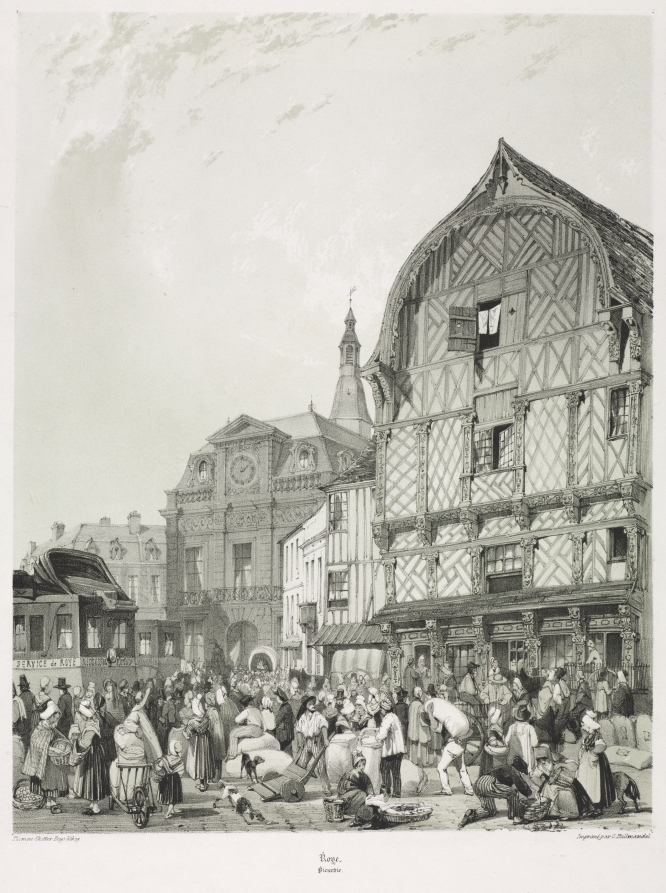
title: Picturesque and Romantic Journeys in Old France, Picardie (Vol. 2): Roye (Voyages pittoresques et romantiques dans l'ancienne France par Charles Nodier, J. Taylor, et Alphonse de Cailleux: Roye)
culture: England, 19th century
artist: Thomas Shotter Boys (British, 1803–1874)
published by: C. Hullmandel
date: 1824, published 1840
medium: lithograph with green tint stone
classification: Print